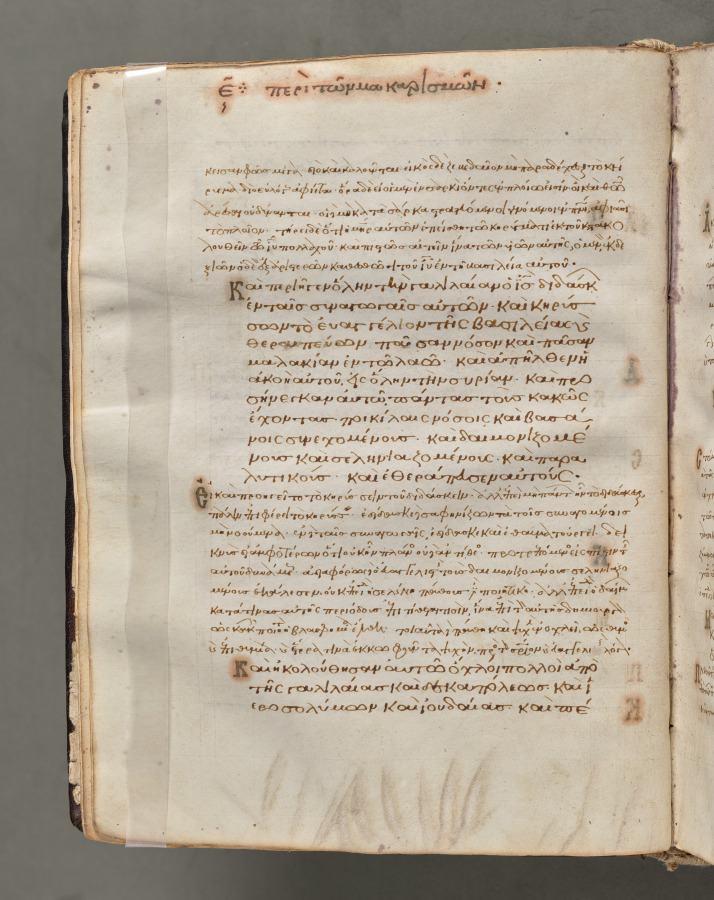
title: Text, folio 17 (verso), from a Gospel Book with Commentaries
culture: Byzantium, Constantinople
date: c. 1000–1100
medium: ink, tempera, and gold on vellum; leather binding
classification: Bound Volume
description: Each of the four gospels in this book opens on a page with brilliantly illuminated borders depicting the author of the text as well as birds-principally peacocks, symbols of the immortality of the soul-and fountains, representing the fountain of life and the salvation of the soul. This volume consists of 428 leaves with texts in Greek. Its level of sophistication suggests that it was probably written and decorated in a monastery in Constantinople.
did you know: Gospel Books were carried in procession through Byzantine churches.